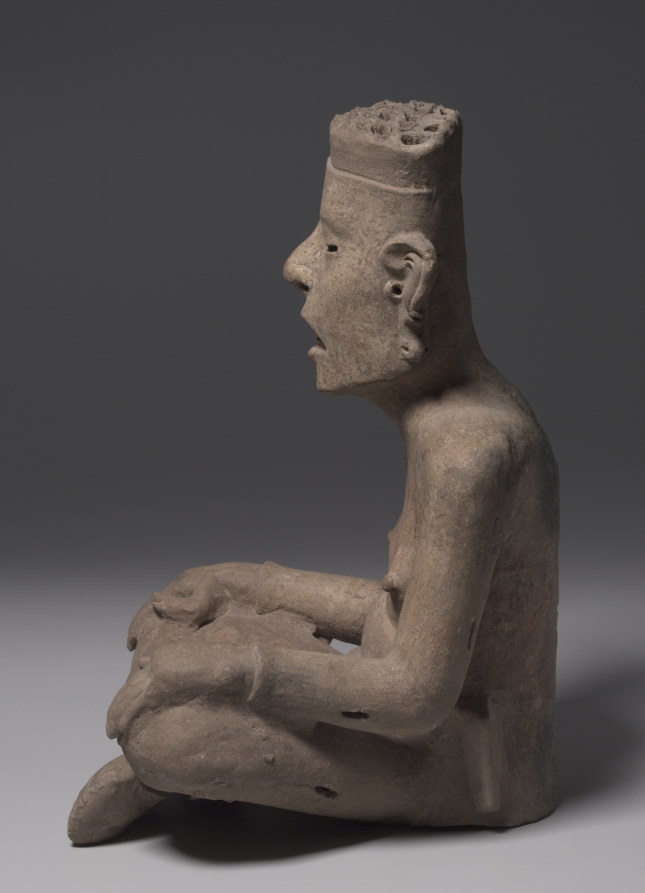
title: Seated Figure Wearing a Skin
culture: Mexico, Gulf Coast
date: 600–1000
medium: earthenware, slip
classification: Sculpture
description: This type of image-showing a human clothed in a sacrificial victim’s skin, visible around the mouth and wrists-is one of the most awesome created by Mesoamerican artists. The figure represents the deity Xipe Totec or a human impersonator. Among the later Aztecs, Xipe was associated with fertility, rain, and renewal. Perhaps the wearer, upon shedding the skin, was conceived as a sprout emerging from a withered husk. Xipe also had military connections.